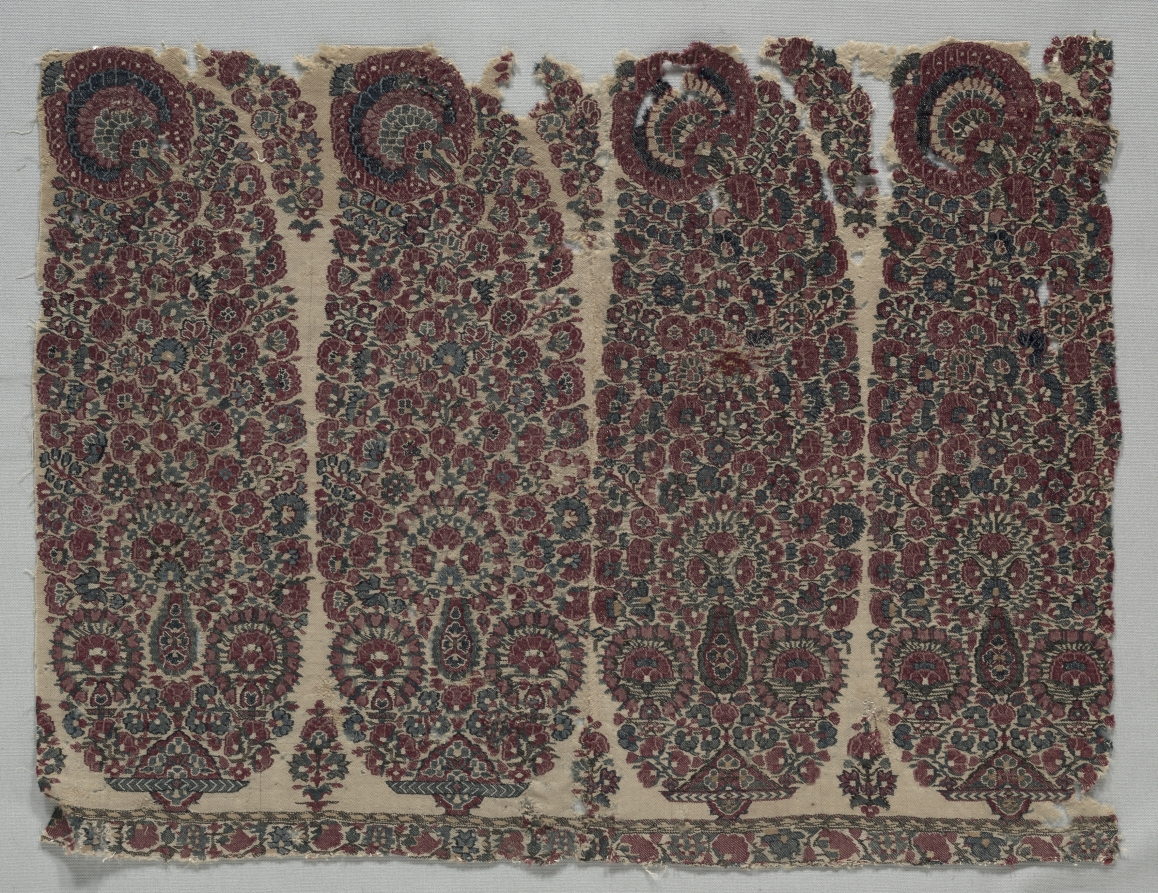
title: Border of a Shawl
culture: India, Kashmir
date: c. 1825–30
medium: wool: tapestry twill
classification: Textile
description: Kashmiri shawls were extremely popular in the early 1800s, especially among foreigners to the Indian subcontinent. Made in the mountainous region of northwest India from wool from mountain goats from nearby Ladakh, the fabrics were especially prized for their softness and their beautiful symmetrical designs, often called paisley in English. This textile fragment was once owned by Ananda Coomaraswamy (1877–1947), a Ceylonese (Sri Lankan) art historian and collector who is credited with introducing South Asian art to museums in the United States.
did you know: The top of the teardrop design recalls fanned-out peacock feathers.